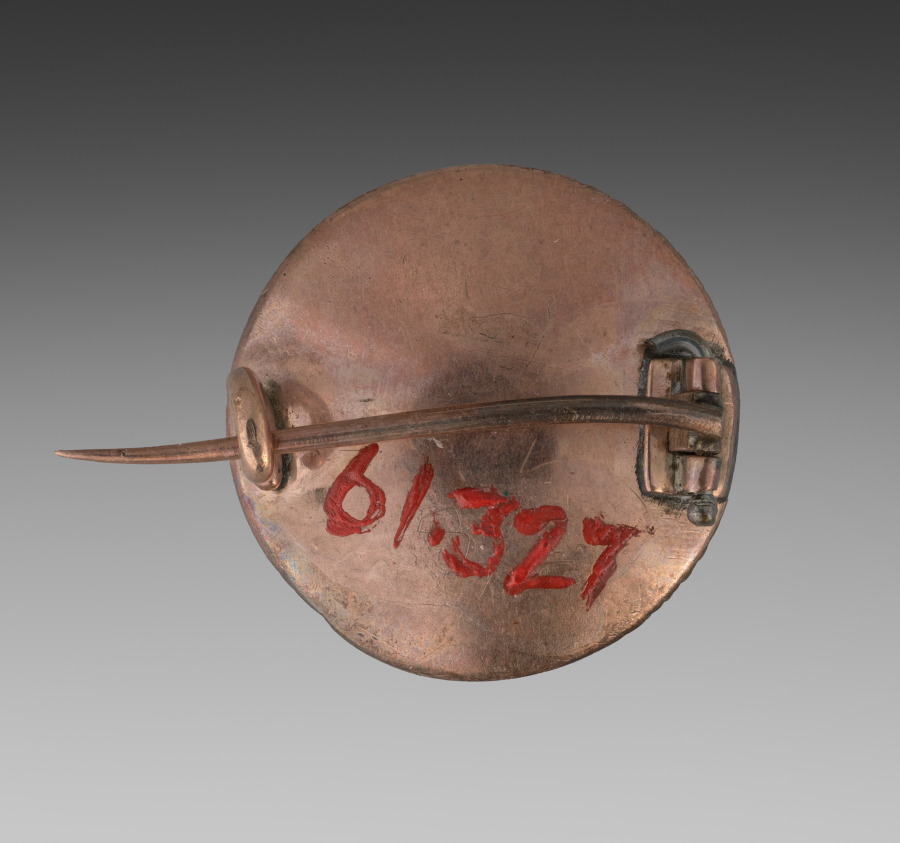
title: Eye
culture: America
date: 1900s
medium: watercolor on ivory set in brooch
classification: Portrait Miniature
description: Eye miniatures were popular in Europe between 1790 and 1830. Only in a few extraordinary cases do we know whose eyes were painted. Their limited scope makes it almost impossible to identify the artist, though we know that many famous miniaturists painted eye portraits including John Smart, Richard Cosway, and George Engleheart. Because the artist and the sitter could be known only to the person who commissioned or received the object, these eyes are distinguished from miniatures and portraits for their private significance and mystery. There are six eye miniatures in the Cleveland Museum of Art's collection. In 2000, three of the CMA's eye miniatures appeared in an exhibition on Alfred Hitchcock and art, highlighting their eerie fascination for modern viewers and their relationship to Surrealism and issues of surveillance.